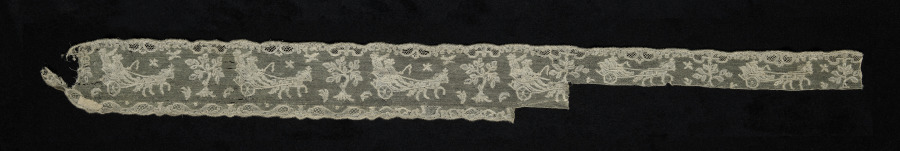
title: Part of a Lace Lappet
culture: Belgium, Mechelen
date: 1740–60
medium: Bobbin lace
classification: Lace